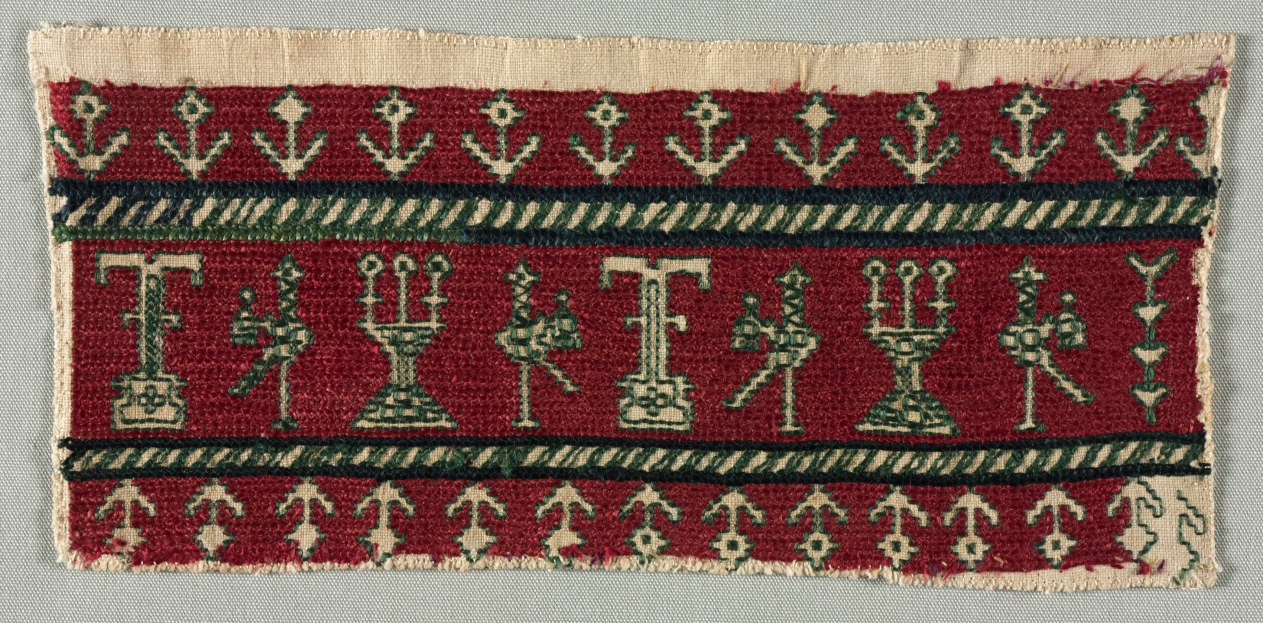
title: Fragment of a furnishing textile (one of five)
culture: Africa, North Africa, Morocco, Azemmour, Moroccan embroiderer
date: 1700s–1800s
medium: Linen, silk, dye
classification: Embroidery